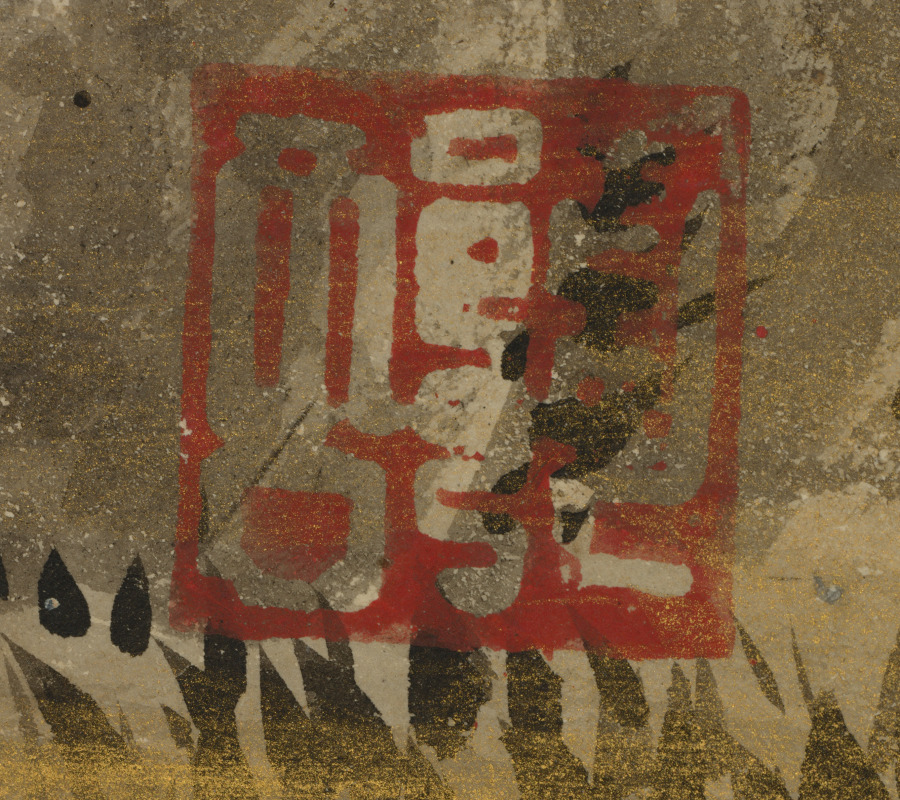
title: Pan Lang (Han Rō)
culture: Japan, Muromachi period (1392–1573)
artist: Shikibu Terutada (Japanese, active mid-1500s)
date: mid-1500s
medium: Fan-shaped painting mounted as hanging scroll; ink and gold on paper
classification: Painting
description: These three fan-shaped paintings, now mounted as individual hanging scrolls, were once part of a set of 20 mounted on a folding screen. They portray the Chinese subjects, from left to right, of the scholar-official Pan Lang, Hanshan reciting his poetry to Shide, and a duck in flight above reeds. Pan Lang grew so fond of the mountain in his place of exile that when he was ordered back to the capital, he rode backward on his donkey so he could see it until it receded into the distance. Hanshan and Shide worked in the kitchen of a Zen monastery, but were actually reincarnations of the bodhisattvas Manjushri and Samantabhadra. The combination of a mandarin duck and reeds may have signified a level of attainment in Chinese civil service exams. All three paintings bear the seal of the Kantobased artist Shikibu Terutada. Shikibu was familiar with Kano school painting, but he also modeled his early style after that of the prominent Kanto-based Kenkō Shōkei (active about 1470–after 1523).